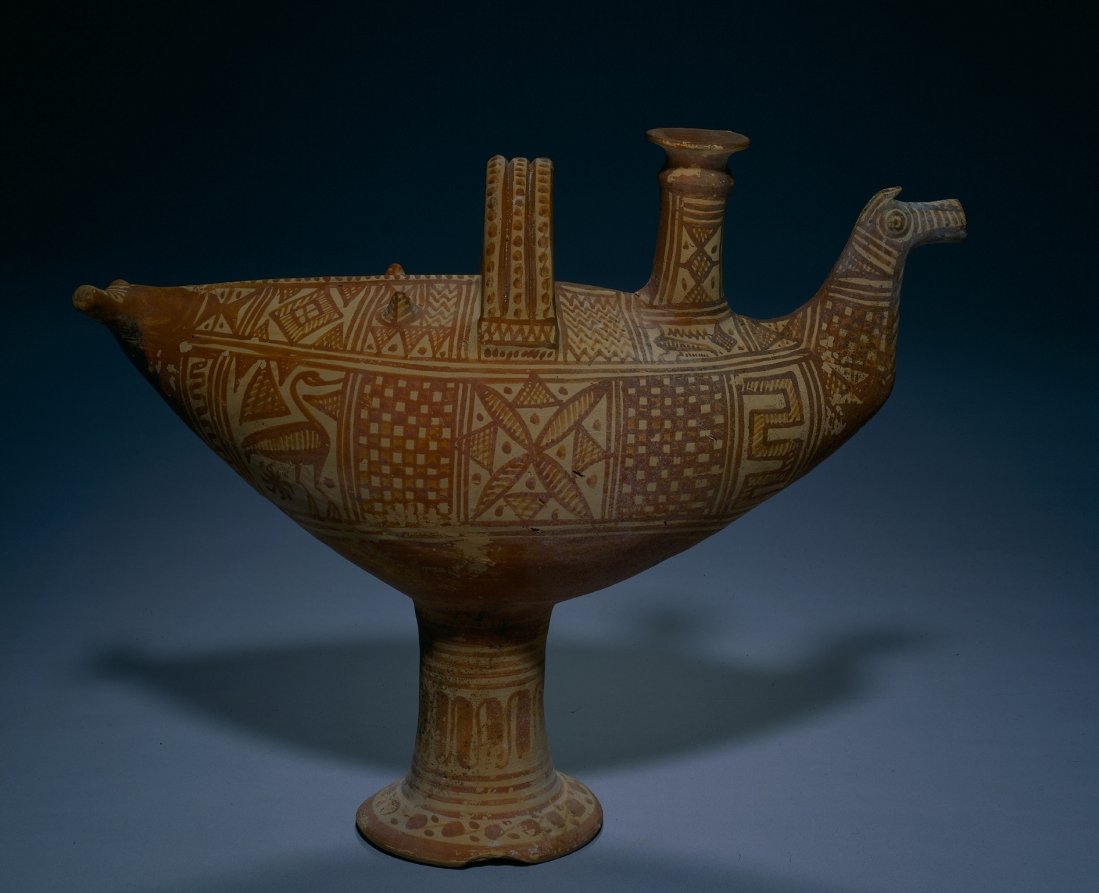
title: Italo-Geometric Bird Askos (Oil Vessel): Hunter (Herakles?) and Stag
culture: Etruscan, likely made at Vulci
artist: attributed to Bisenzio Class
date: c. 700 BCE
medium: ceramic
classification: Ceramic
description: This bird-shaped askos (oil vessel), with a tall filling spout and a pierced beak for pouring, perhaps held perfumed oil for a funerary function. Although the shape likely stems from Italian tradition, the abundantly painted geometric decoration, covering nearly every available surface, derives originally from Greece. Thus scholars have suggested that an immigrant Greek potter working in Etruria may have made the vessel. The sole narrative scene shows a man with a spear leading an antlered animal. If not an anonymous hunter, this could be the earliest known representation of the hero Herakles performing his third labor: capturing the golden-antlered Keryneian hind, or female deer.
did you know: This askos may feature the earliest known representation of Herakles's third labor, the Keryneian hind.